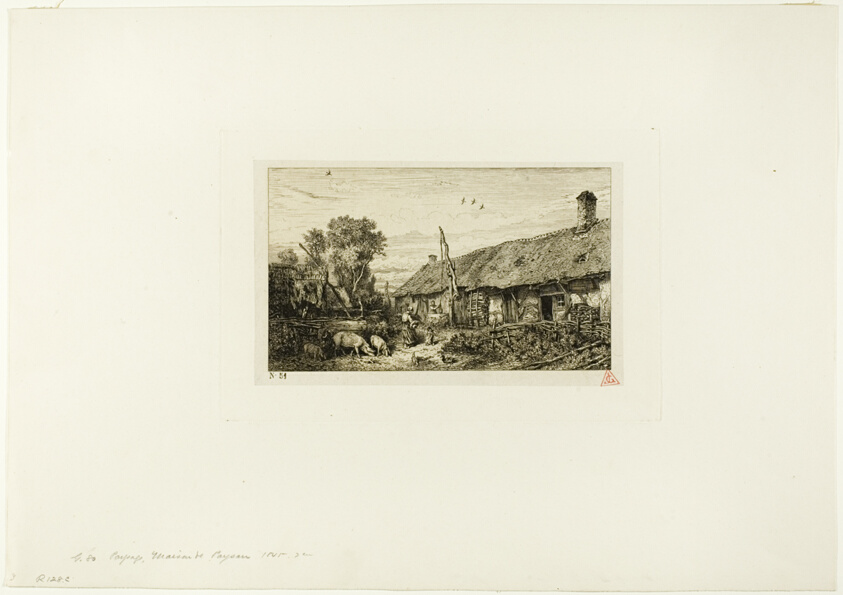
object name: Print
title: Landscape with Peasant Home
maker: Charles Émile Jacque (French, 1813-1894)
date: 1845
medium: Etching and drypoint on light gray China paper laid down on ivory wove paper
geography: France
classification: etching; print; prints and drawing